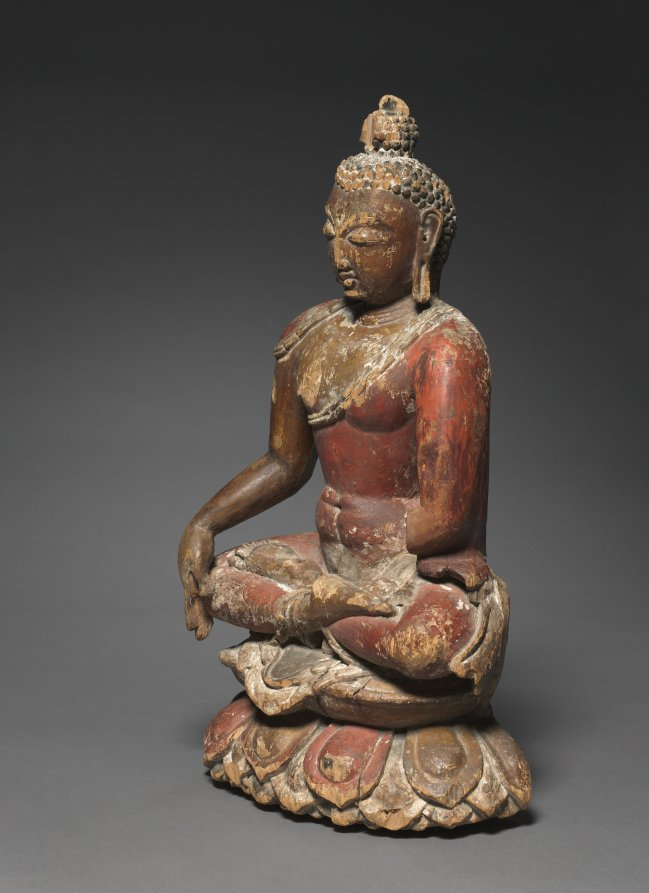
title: Seated Buddha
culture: Western Himalayas, possibly Ladakh or Lahul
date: 1000s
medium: painted wood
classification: Sculpture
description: Eleventh-century western Tibet experienced a period of fervent reconstruction of Buddhist monasteries following the persecution of Buddhism during the 9th and 10th centuries. Art from Kashmir was avidly collected and copied as part of those reconstruction efforts. Kashmiri stylistic traits, such as the pinched waist and abdominal musculature seen in this rare wooden image, are from that critical time. The pioneering Italian Tibetologists Giusseppe Tucci and Egenio Ghersi discovered this sculpture during an expedition to Tibet from 1933 to 1935